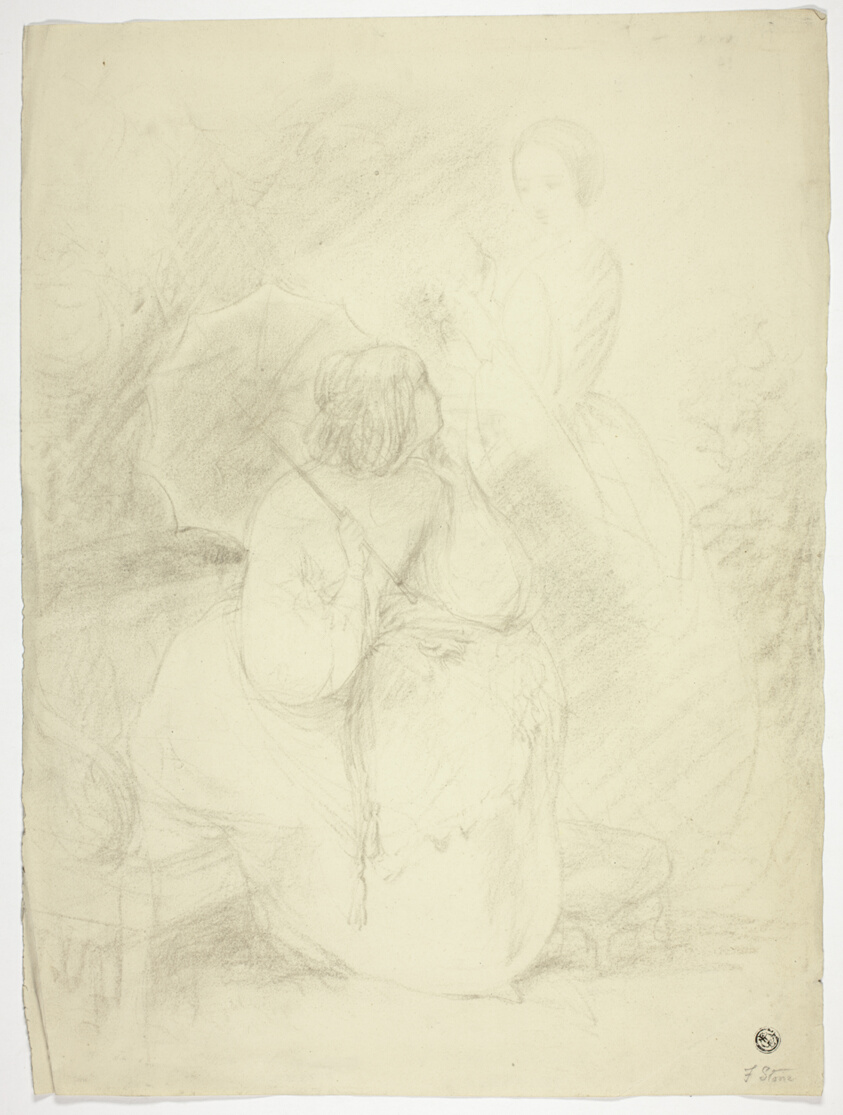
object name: Drawing and Watercolor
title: Two Women in a Park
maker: Attributed to Frank Stone; English, 1800-1859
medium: Brown chalk transfer on cream wove paper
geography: England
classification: chalk; paper; drawings (visual works); prints and drawing